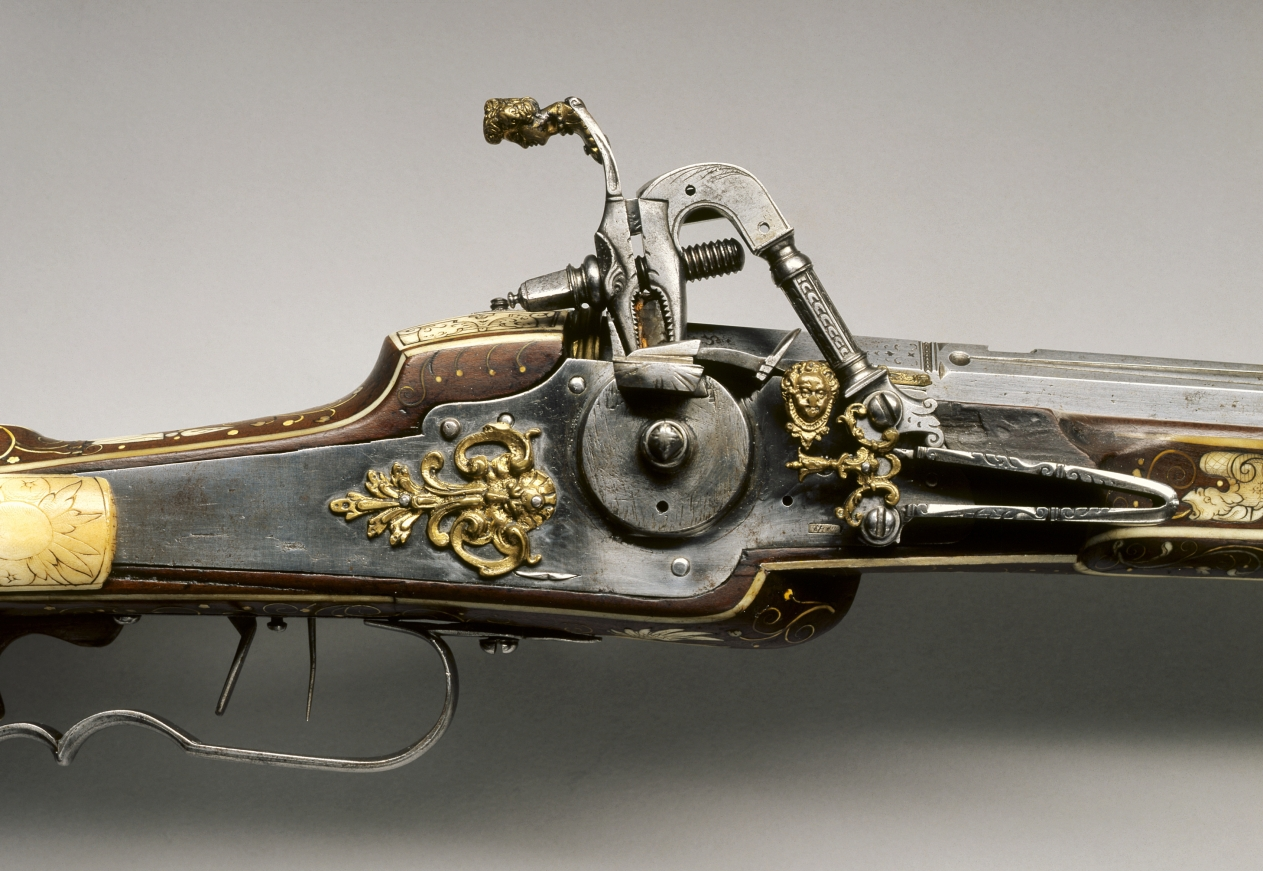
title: Wheel-Lock Rifle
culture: Germany, Bavaria (?), 17th century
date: 1618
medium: steel, brass, walnut stock inlaid with bone, horn and ivory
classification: Arms and Armor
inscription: on barrel: 1618, S.H.; on stock: FF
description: Made originally as a petronel pistol, this firearm seems to have been refitted with a new stock sometime during the 17th century to convert it into a rifle, most likely for a child's use.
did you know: The artisan who made this rifle used brass, bone, horn, and ivory to create decorative elements like animals involved in the hunt, fruits, and other details. If you look beneath the gun, you will see a goose or duck and a vase of flowers near the trigger.